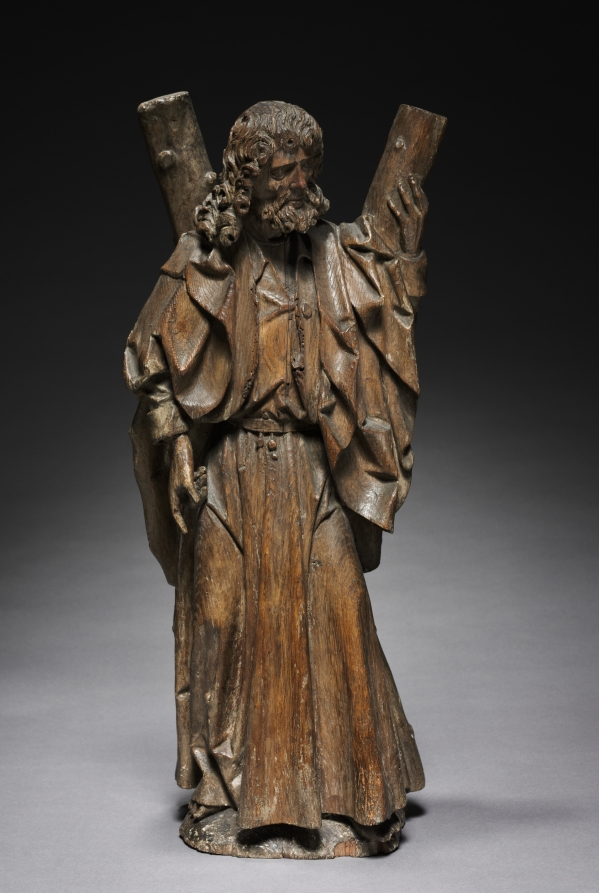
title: Saint Andrew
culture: Netherlands, Elsloo, 16th century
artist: circle of Master of Elsloo (Netherlandish)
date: c. 1515–20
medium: oak with traces of paint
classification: Sculpture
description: Apostle figures such as this were made in large numbers in the eastern Netherlands during the early 1500s. This figure of Saint Andrew, identified by his X-shaped cross, was undoubtedly a single figure from an apostle series. It may have been used above a choir stall in a church, or else part of an apostelbalk, a wooden beam with a figure of Christ at the center. These beams were mounted high above the interior of the church to separate the nave (used by lay people) from the sanctuary, accessible only to the clergy. The artist is named after a multicolored group of Saint Anne with the Virgin and Child, now in the Augustinuskerk in Elsloo, the Netherlands. The sculptor is probably Jan van Oel, who was working in and around Roermond in about 1500–1520. Most of the sculptures attributed to this master are in churches in Belgium and Dutch Limburg and in the neighboring German region.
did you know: Traces of paint found on this sculpture suggest that at one point it was painted.